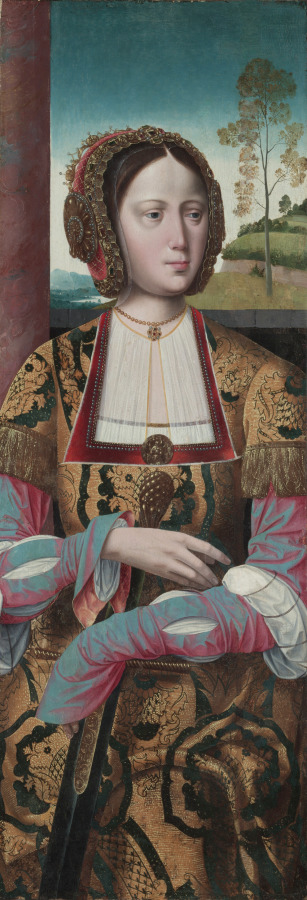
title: Saint Catherine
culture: Flanders, Bruges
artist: Master of the Holy Blood (Netherlandish)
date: c. 1520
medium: tempera on wood panel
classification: Painting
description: Saint Catherine holds the sword with which she was martyred. This painting and another in the collection (1942.633.2) were originally the wings of an altarpiece flanking a central panel, now lost, that may have depicted the Holy Family. The identity of this artist is unknown, but he is named for a painting in the Chapel of the Holy Blood in Bruges. Bruges flourished as an international commercial center through the 1400s and early 1500s. Among its residents were many foreign merchants and bankers who, along with the Burgundian court, patronized artists and attracted specialized craftsmen such as furriers, hatters, jewelers, and goldsmiths. Bruges’s artistic production in the 1400s included celebrated artists like Jan van Eyck, Petrus Christus, Hans Memling, and Gerard David who painted large altarpieces, small panels for private devotion, and portraits. Bruges also remained an important center for the production of illuminated manuscripts.